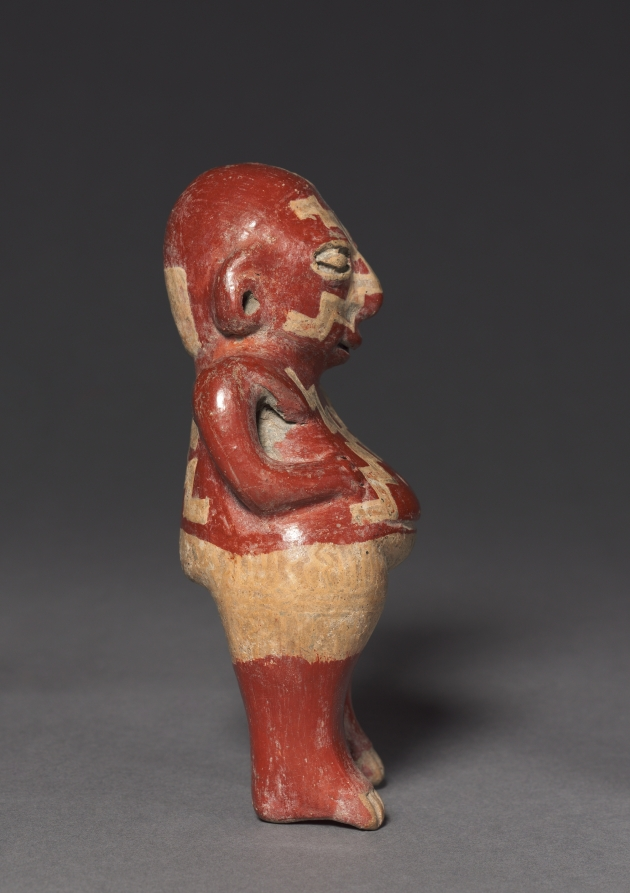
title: Geometrically Patterned Female Figure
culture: Mesoamerica, Guanajuato or Michoacán, Chupícuaro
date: 400–100 BCE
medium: Ceramic, slip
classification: Sculpture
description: Artists of the Chupícuaro culture, based to the north of modern-day Mexico City, may be best known for hollow ceramic figurines like this one. Always female and often apparently pregnant, such figurines commonly are painted with stepped geometric motifs in vibrant, highly burnished slips (creamy mixtures of water and crushed minerals). The meanings of the motifs and the figurines themselves are poorly understood.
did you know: This figure was formed in two halves that were hollowed out and joined at the hips.